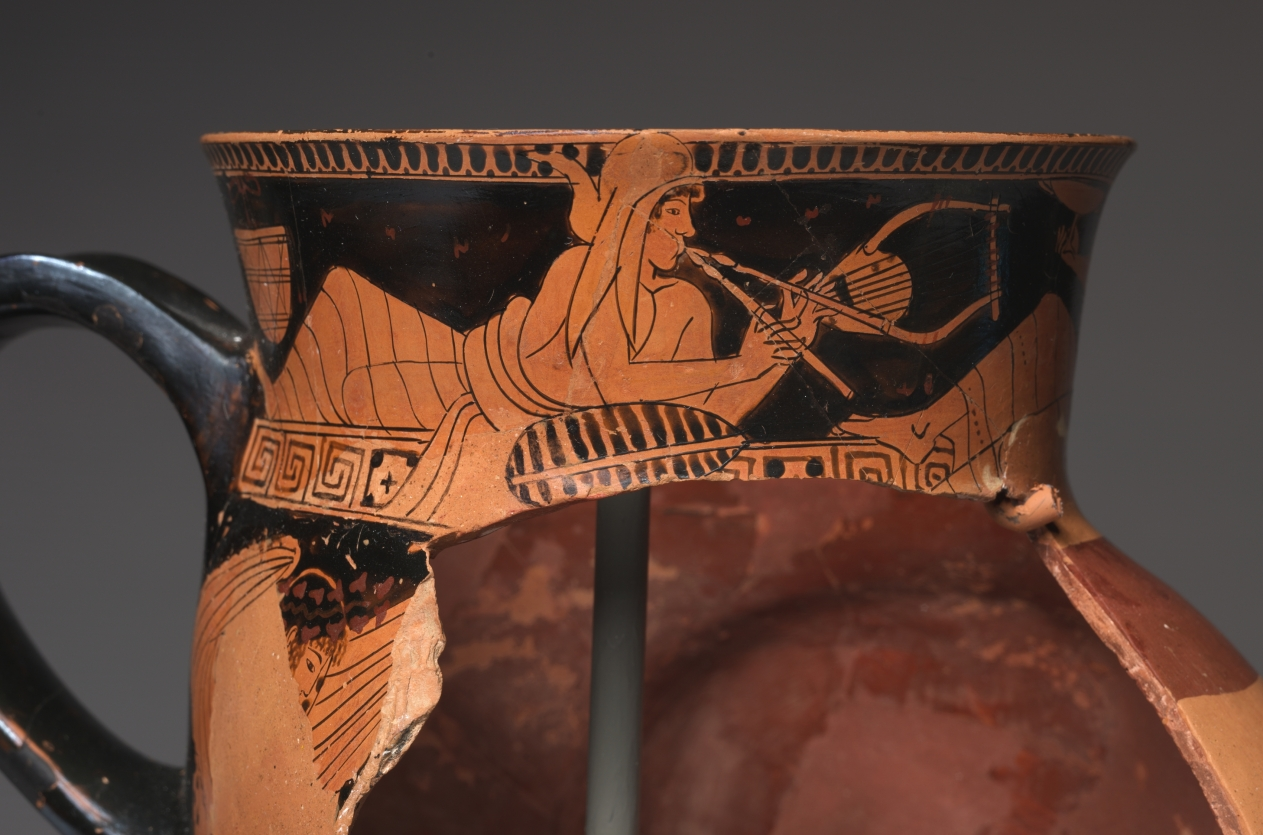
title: Red-Figure Ram-Head Rhyton (Drinking Vessel): Symposiasts; Satyr and Maenad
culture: Greek, Attic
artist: attributed to Brygos Painter (Greek, Attic, active c. 490–470 BCE)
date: c. 480–470 BCE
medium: ceramic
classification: Ceramic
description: Although now missing nearly half of its mold-made ram’s head, this rhyton, a kind of drinking horn, retains most of its painted red-figure sections. On the wheel-made bowl above, three symposiasts recline at a drinking party: a youth wearing a kidaris (flapped Scythian hat) and two bearded men holding drinking cups. The youth plays the pipes, while a lyre hangs nearby and one man throws his head back in song. The letters around them, which do not spell out known words, may allude to the music in the air. Flanking the handle are a pipe-playing satyr and a dancing maenad (only partially preserved).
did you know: This vessel once had a foot, but only a bit of its stem remains.